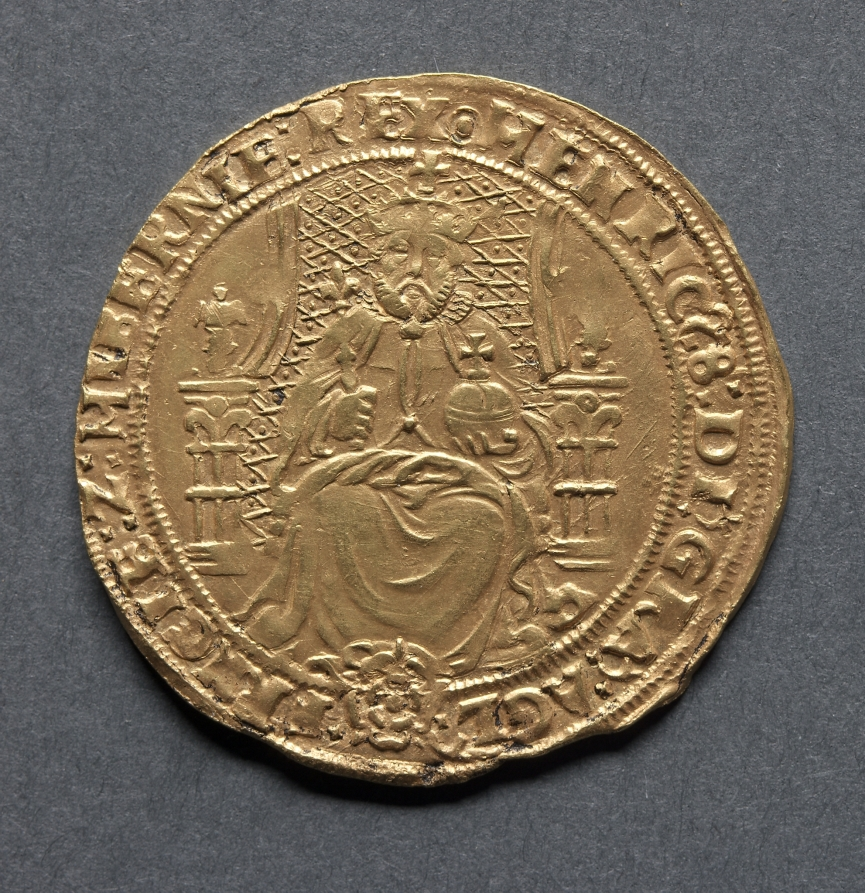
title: Half Sovereign: Henry VIII (obverse);Crowned Arms (reverse)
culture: England, Henry VIII, 1509-1547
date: 1544–1547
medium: gold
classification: Coins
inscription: HENRIC. 8. DI. GRA. AGL FRNCIE Z. HIBERNIE REX